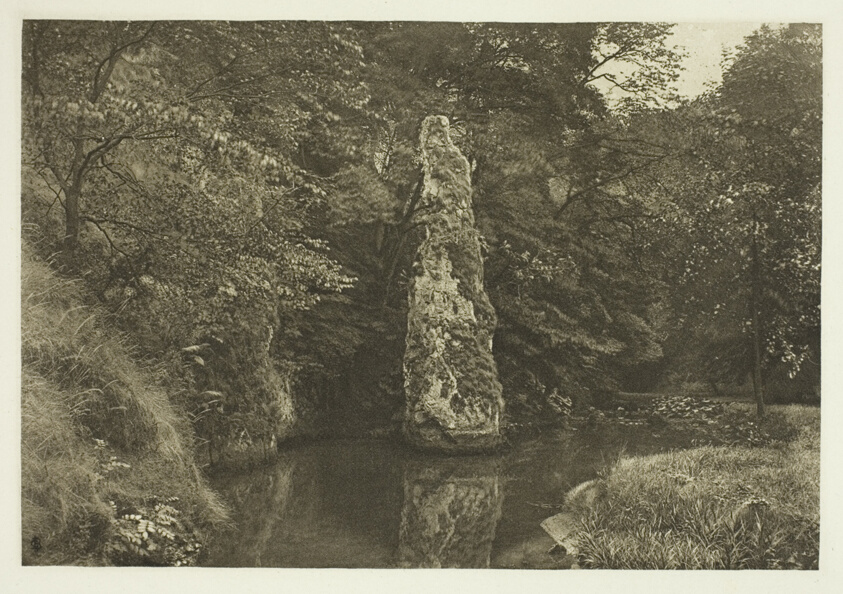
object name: Photograph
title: "Pike Pool," Beresford Dale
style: 19th century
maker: Peter Henry Emerson (English, born Cuba, 1856–1936)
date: 1880s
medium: Photogravure, plate L from the album "The Compleat Angler or the Contemplative Man's Recreation, Volume II" (1888)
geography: England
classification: photogravure; photomechanical process; photography; photograph